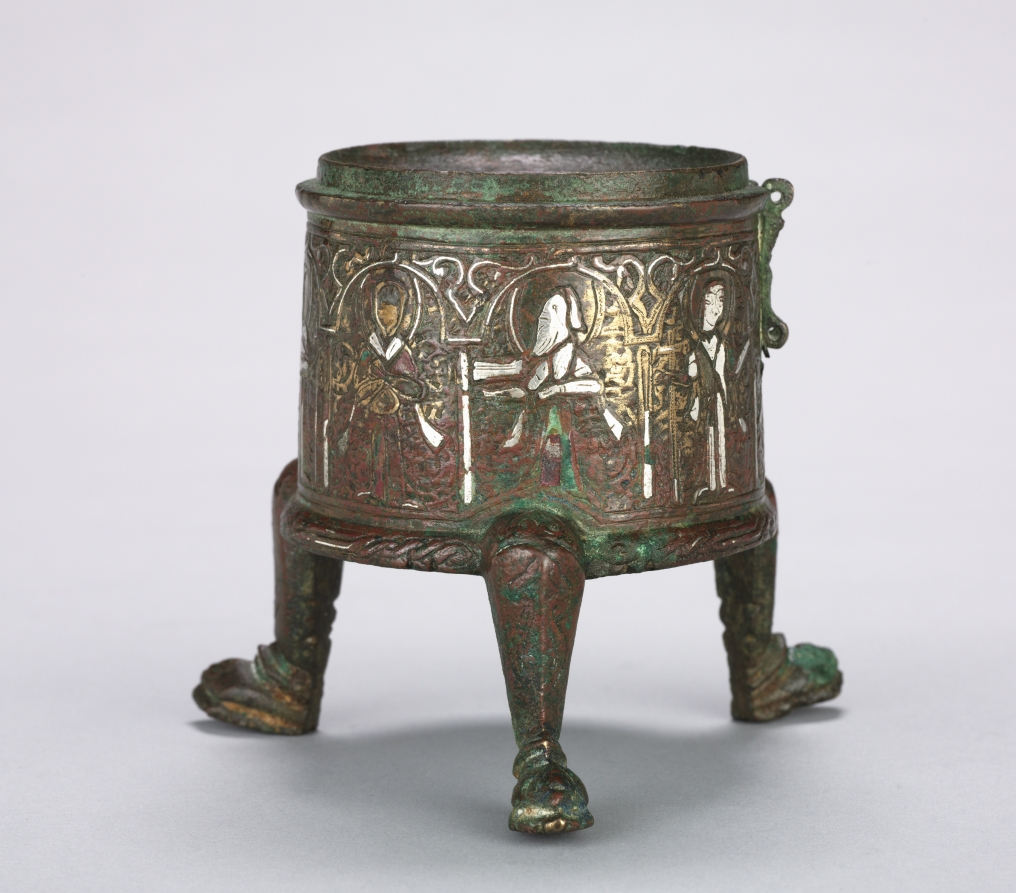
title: Incense Burner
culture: Syria, Ayyubid Period, 13th Century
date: 1200–1250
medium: brass inlaid with silver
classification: Metalwork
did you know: This footed vessel is wearing shoes.